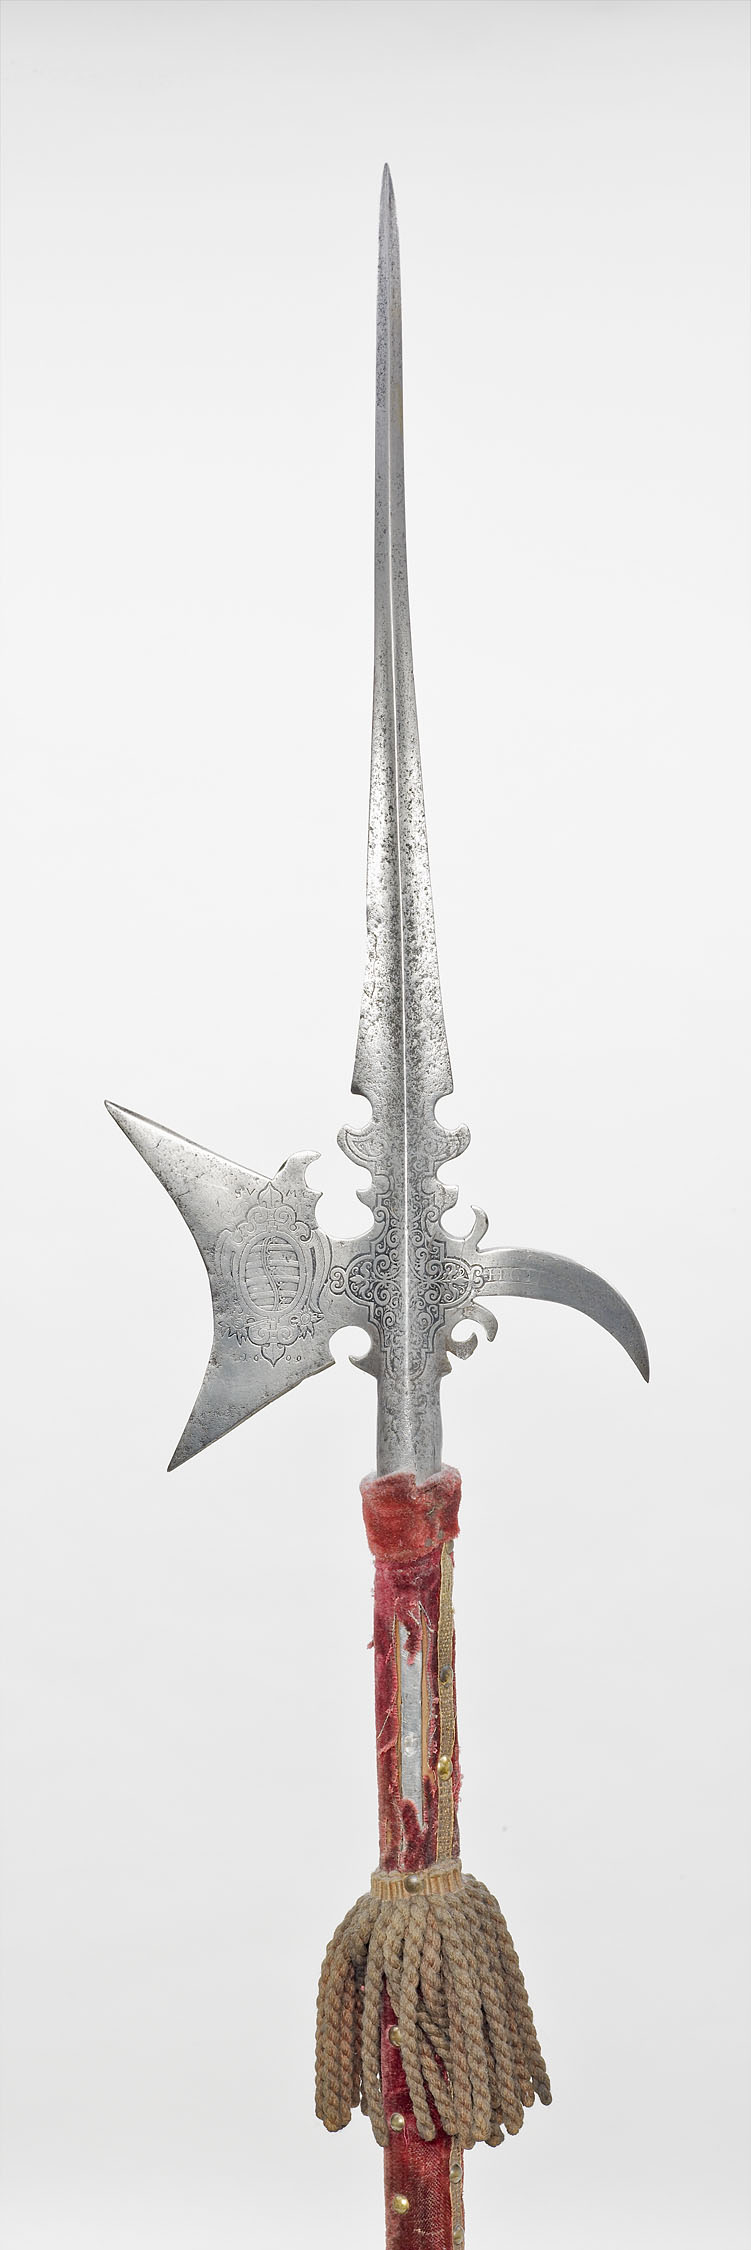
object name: Arms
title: State Halberd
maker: German, Saxony; Of the guard of John George, Duke of Saxony (reigned as Elector 1611-56)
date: 1609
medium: Steel, brass, wood, and velvet weave, attached tassel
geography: Saxony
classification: edged weapon-staff; arms; arms and armor